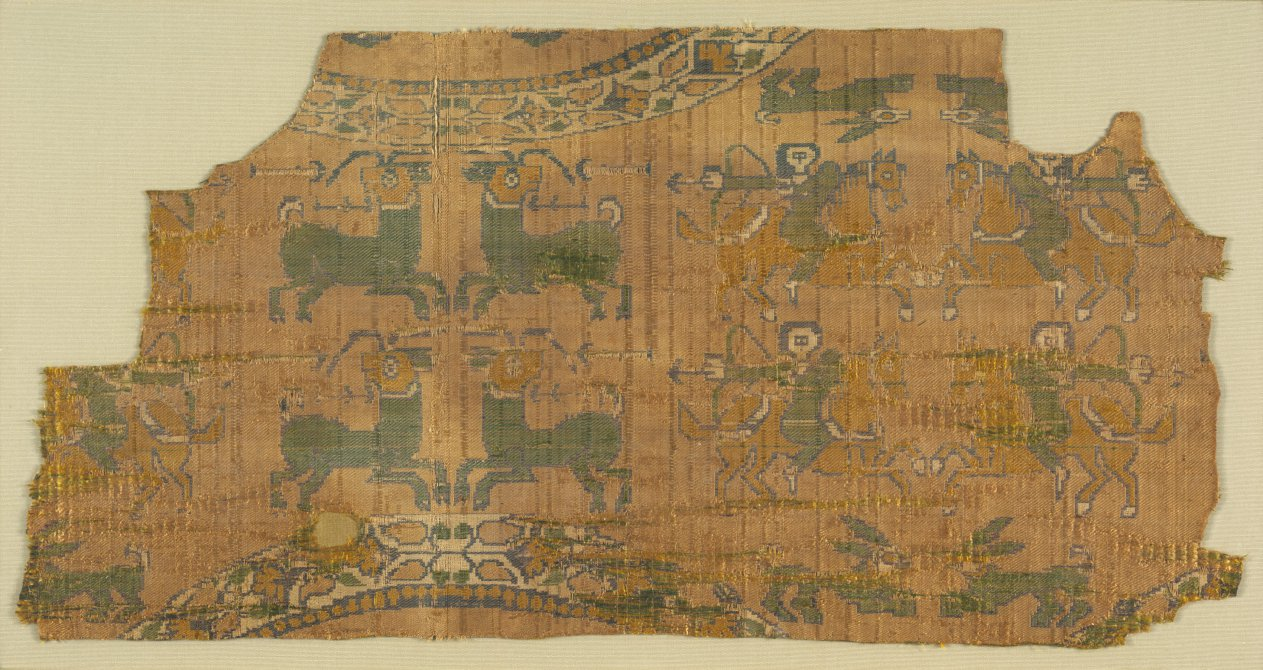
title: Samite fragment with hunters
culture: Eastern Iran or Central Asia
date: 800s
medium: Silk: compound twill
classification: Textile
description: This silk depicts pairs of horsemen hunting ibexes (mountain goats). The ibexes and two pairs of rabbits originally filled the spaces between rows of large floral roundels. Portions of the roundels are preserved at the top and bottom. Although the design was greatly influenced by silks from Egypt and Syria, the abstract style is typically Sogdian, from an area in Central Asia. This is one of many Sogdian silks that were traded to Europe and eventually preserved in church treasuries.